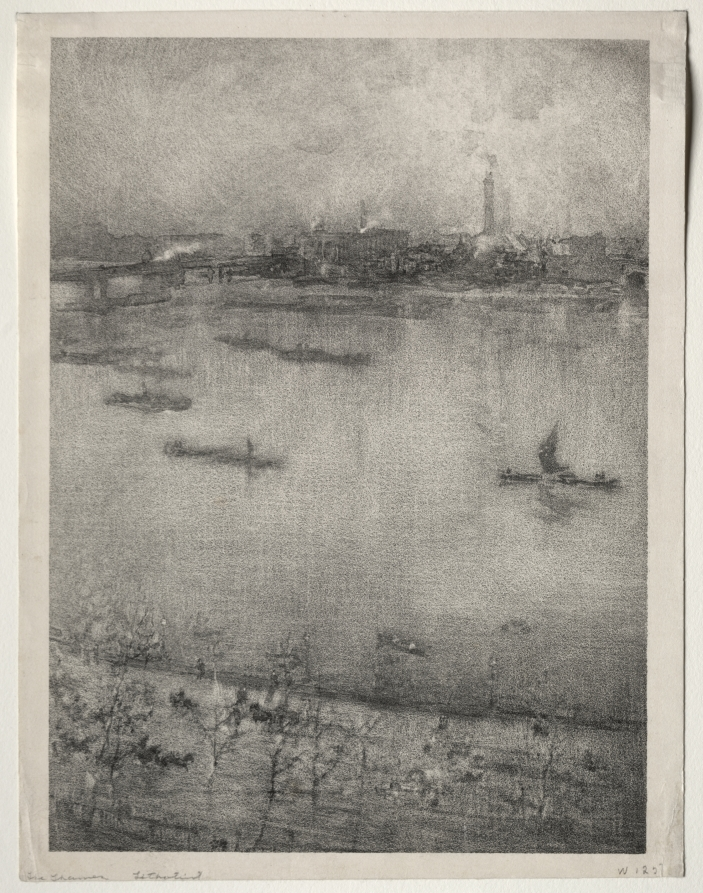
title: The Thames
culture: America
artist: James McNeill Whistler (American, 1834–1903)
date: 1896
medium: lithograph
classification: Print